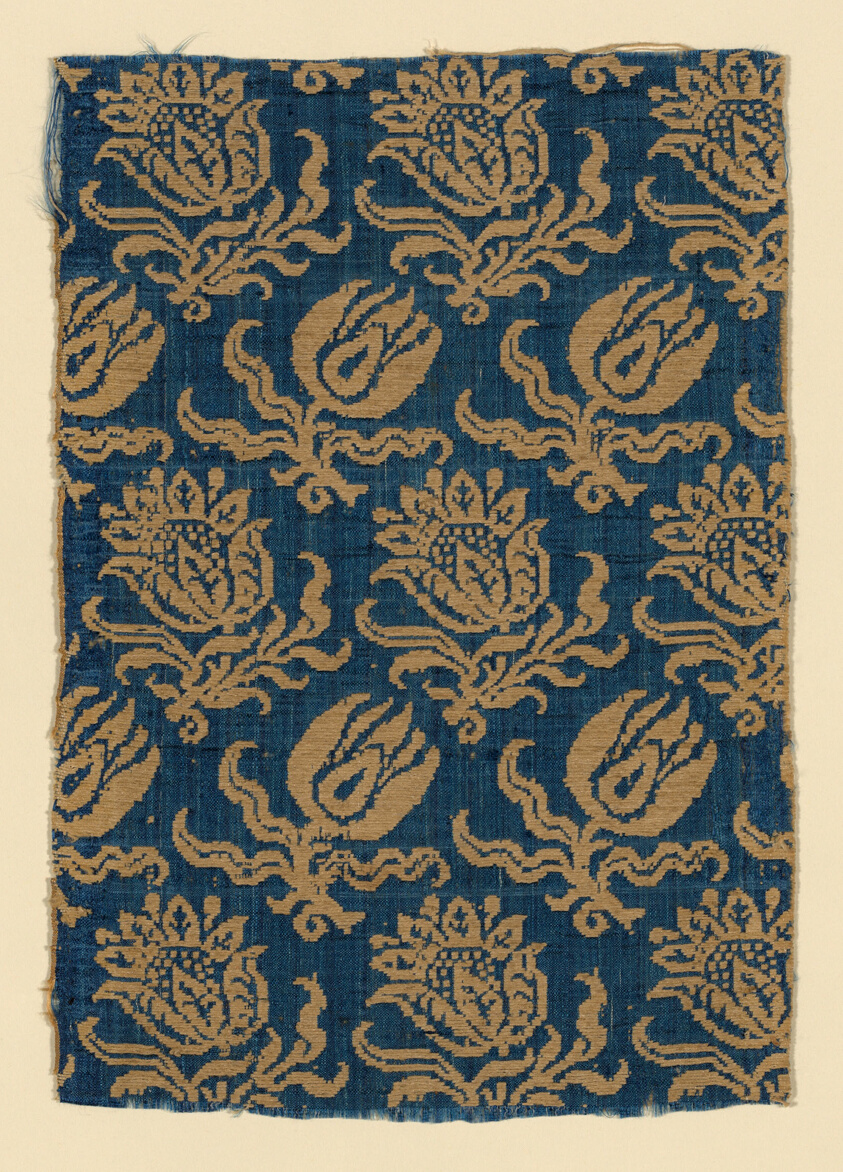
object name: Textile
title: Fragment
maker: Italy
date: 1650/1700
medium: Linen and silk, compound weave (i.e.: Beiderwand or lampas 2:1)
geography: Italy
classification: textile; weaving